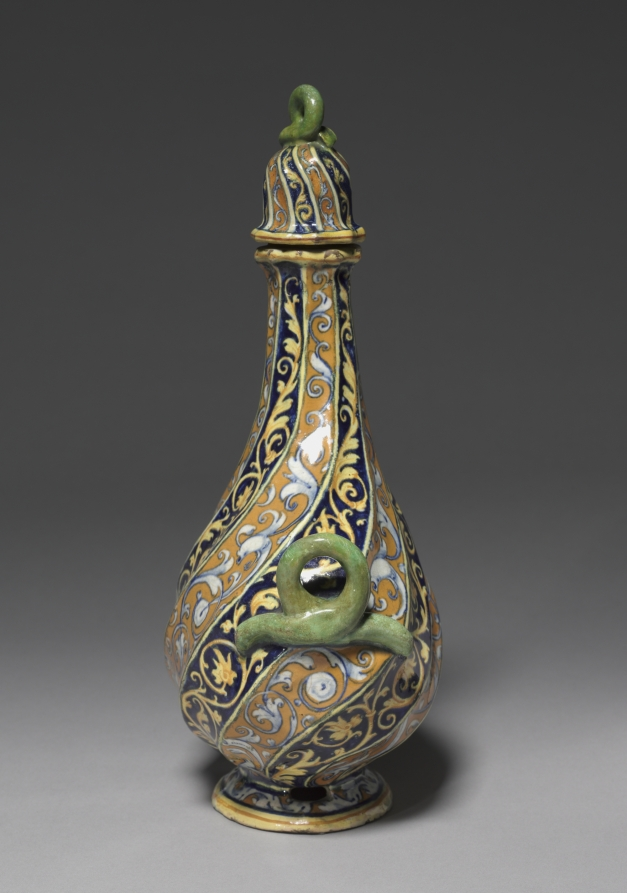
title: Pilgrim Bottle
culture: Italy, Papal States, Faenza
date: c. 1540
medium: tin-glazed earthenware (maiolica)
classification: Ceramic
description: During the Italian Renaissance of the 1400s and 1500s, nobles and merchants eager to express their wealth and sophistication ordered ceramics for dining, display, and storage. Known as maiolica, because it resembled the brightly colored ceramics from the Mediterranean island of Majorca, these ceramic vessels were covered with a tin glaze that provided an opaque white surface on which colorful decoration could be painted.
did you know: This pear-shaped vessel recalls flasks that early travelers tied to the harnesses of their horses on long trips or pilgrimages to holy sites.